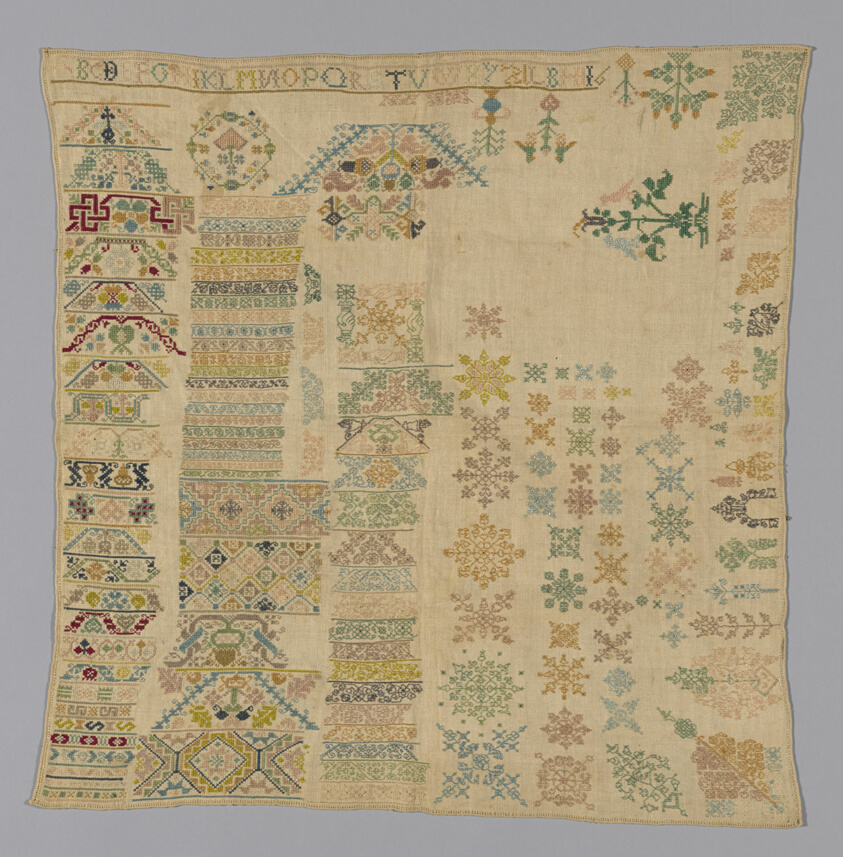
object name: Textile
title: Sampler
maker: Germany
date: 17th century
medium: Linen, plain weave; embroidered with silk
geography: Germany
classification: textile; needlework (visual works); sampler